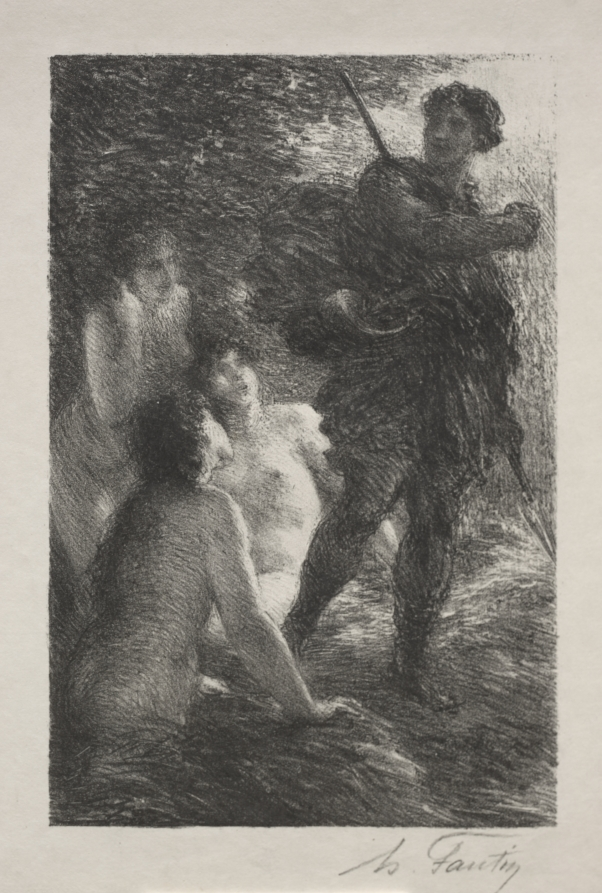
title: Twilight of the Gods, Act III: Sigfried and the Rhine Maidens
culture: France, 19th century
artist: Henri Fantin-Latour (French, 1836–1904)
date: c. 1886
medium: lithograph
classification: Print